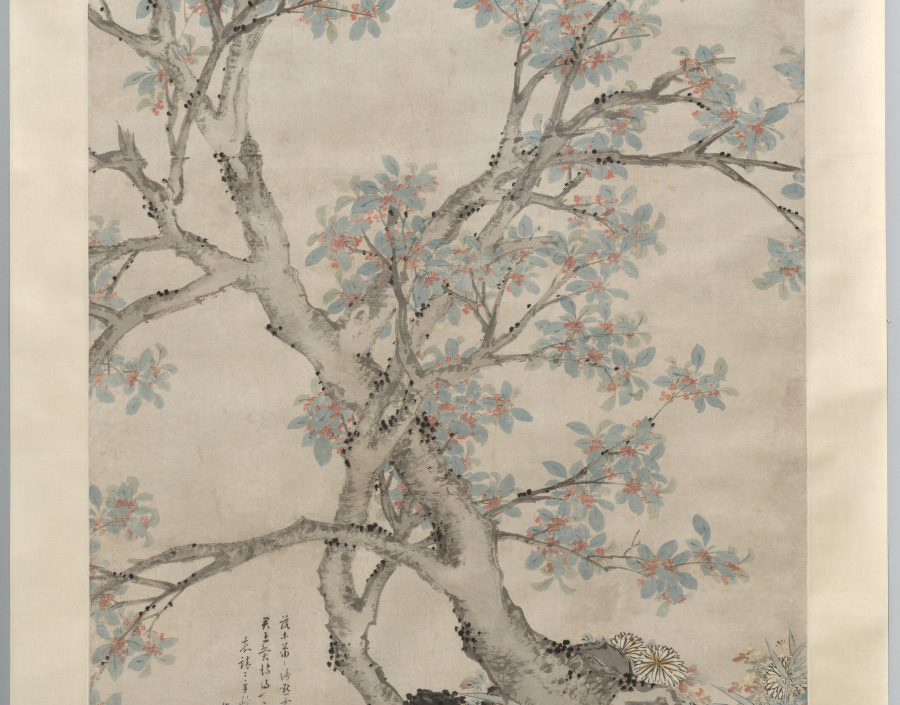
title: Yellow Chrysanthemums and Red Osmanthus in the Style of Wang Yuan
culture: China, Ming dynasty (1368–1644)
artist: Shen Zhou (Chinese, 1427–1509)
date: 1468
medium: hanging scroll, ink on paper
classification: Painting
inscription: Artist's inscription, signature, and 2 seals at upper right: Beneath the fence yellow [chrysanthemum] flowers brave the rain to blossom;/ Still others lean on the red osmanthus tree and dazzle the deep green moss./ With a goblet [of wine] I face them, entirely without concern;/ Who will answer the knocking at the gate where a guest has arrived? In the ninth month of the fourth year of the Chenghua era [1468], I followed the brush-conception of Wang Danxuan 王澹軒 [Wang Yuan 王淵] at the Youzhuzhuang 有竹庄 [House with Bamboo]. Inscribed and [painted] by Shen Zhou 沈周 of Changzhou 長洲. [seals] Shitian 石田; Shen shi Qinan 沈氏启南. trans. HR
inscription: 1 additional inscription, dated 1523, and 2 seals of Wang Chong 王寵 (1494-1533).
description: Shen Zhou, a native from Suzhou, was descended from a prominent land-owning family with strong ties to literati culture. Because Shen Zhou never entered government service, he had ample opportunity to cultivate the arts of painting, poetry, and calligraphy. Chrysanthemums and red osmanthus both bloom in autumn. The deep orange osmanthus flowers emanate a characteristically sweet fragrance. According to his inscription on the painting, Shen Zhou sought to imitate the style of the Yuan dynasty (1271–1368) painter Wang Yuan. His color-filled brushstrokes and washes, however, anticipate the flower painting style of Yun Shouping, whose Peonies are also in the Cleveland Museum of Art collection, https://www.clevelandart.org/art/1967.192. The sheer size and complex composition of this scroll are impressive.